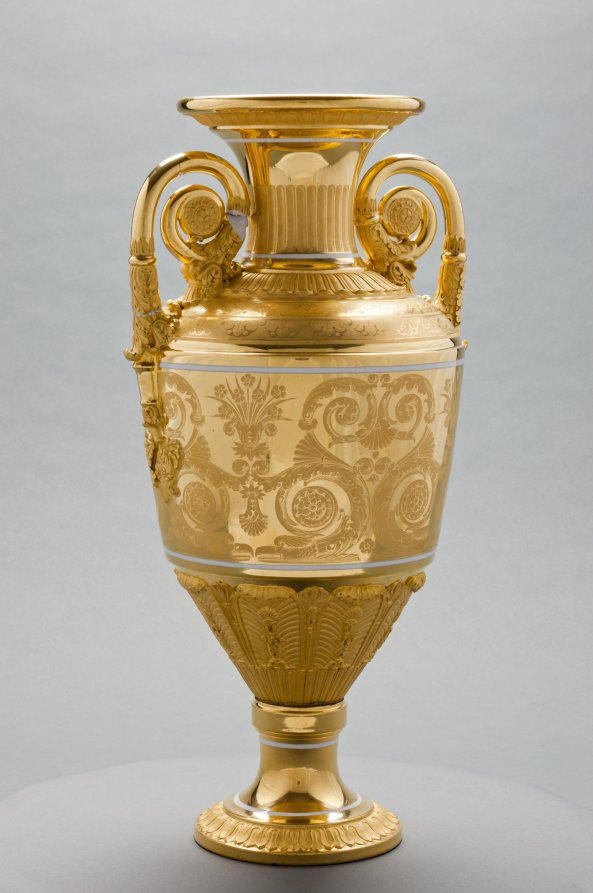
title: Vase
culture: Russia, St. Petersburg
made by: St. Petersburg Imperial Porcelain Factory (Russian)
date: c. 1820–1830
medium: gilt porcelain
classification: Ceramic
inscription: inscribed: "Moreau" in gold near lip.